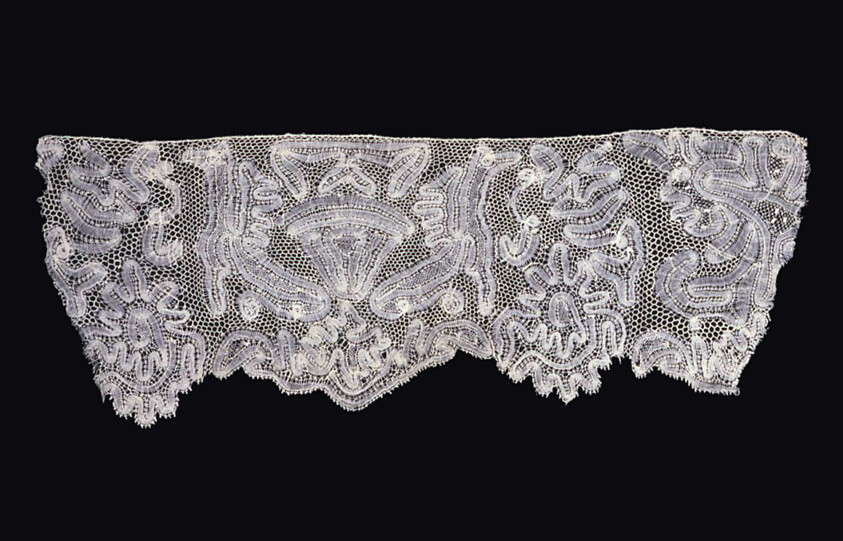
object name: Textile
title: Fragment (Border)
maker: Eastern Europe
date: 1775/1825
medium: Linen, bobbin part lace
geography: Eastern Europe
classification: textile; lace - bobbin; lace